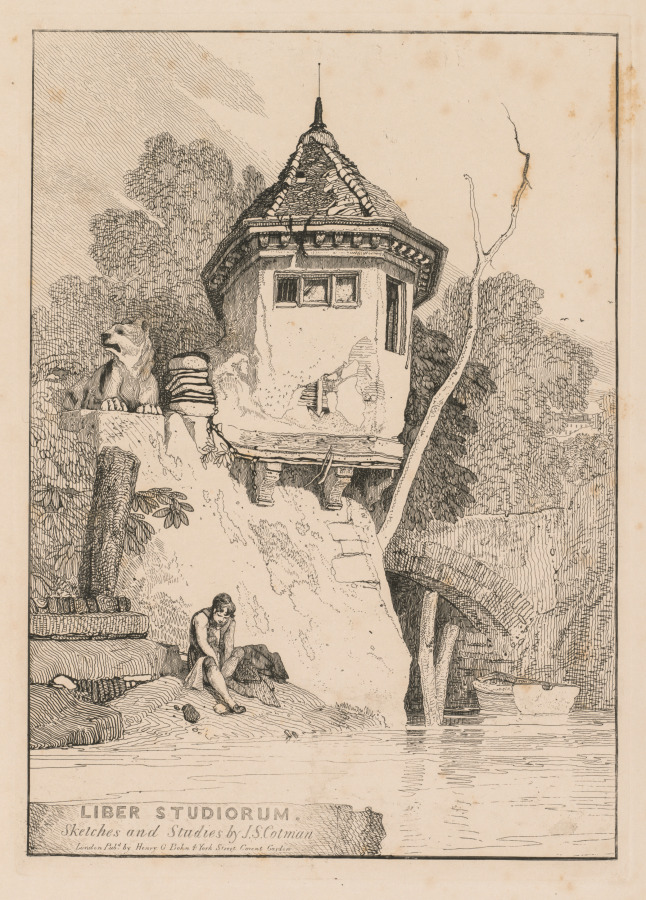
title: Liber Studiorum; Frontispiece, View of a Garden House on the Banks of the River Yare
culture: England, 19th century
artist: John Sell Cotman (British, 1782–1842)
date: 1838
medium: softground etching, from a bound volume containing 48 plates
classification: Bound Volume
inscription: On plate, within image, lower left: LIBER STUDIORUM. / Sketches and Studies by J. S. Cotman / London Pubd by Henry G. Bohn 4 York Street Covent Garden